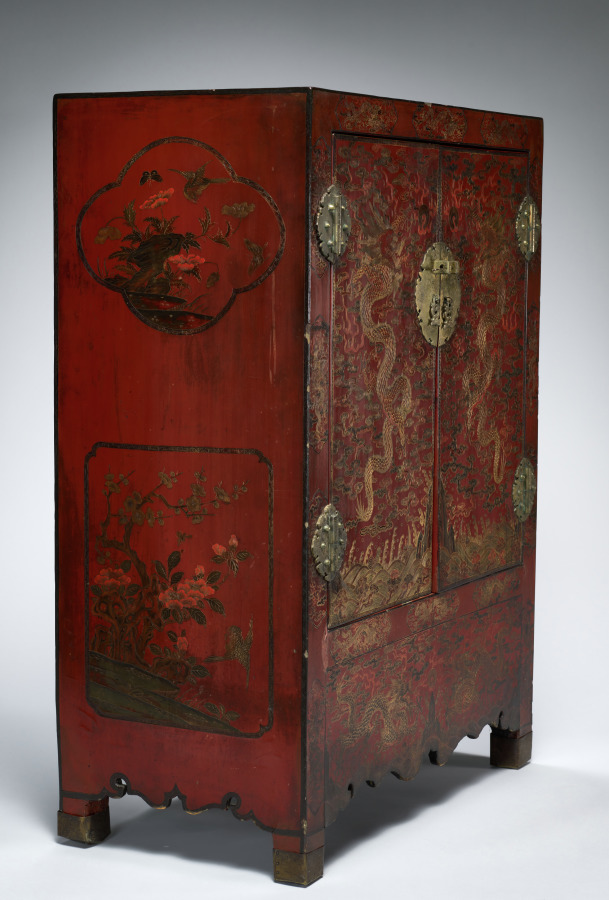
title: Double Cabinet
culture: China, Ming dynasty (1368-1644) - Qing dynasty (1644-1911)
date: 1600s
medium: red lacquer on wood with pigment and gilding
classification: Furniture and woodwork